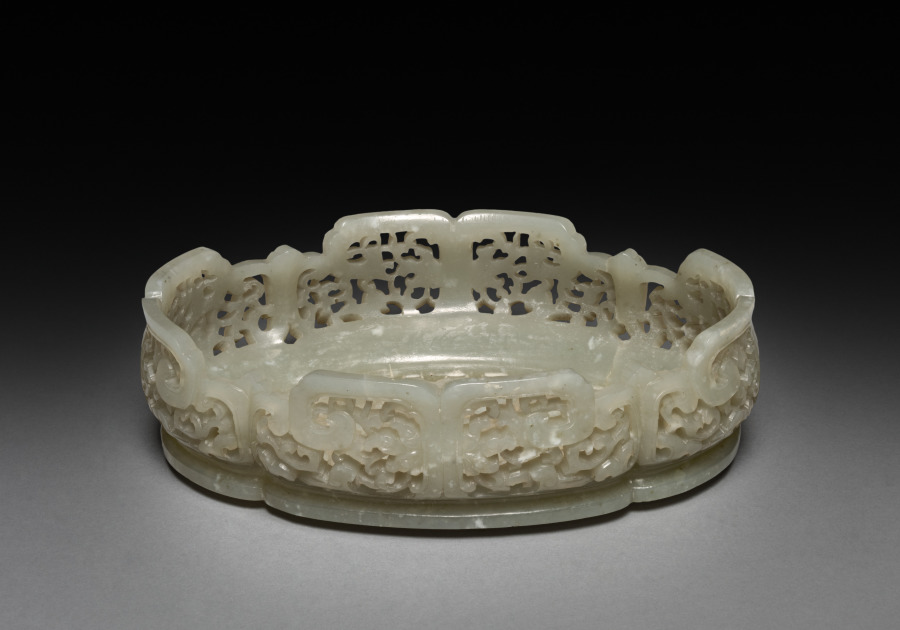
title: Octofoil Dish with Three Boys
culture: China, Qing dynasty (1644–1911), Qianlong reign (1736–95)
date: 1700s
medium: jade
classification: Jade